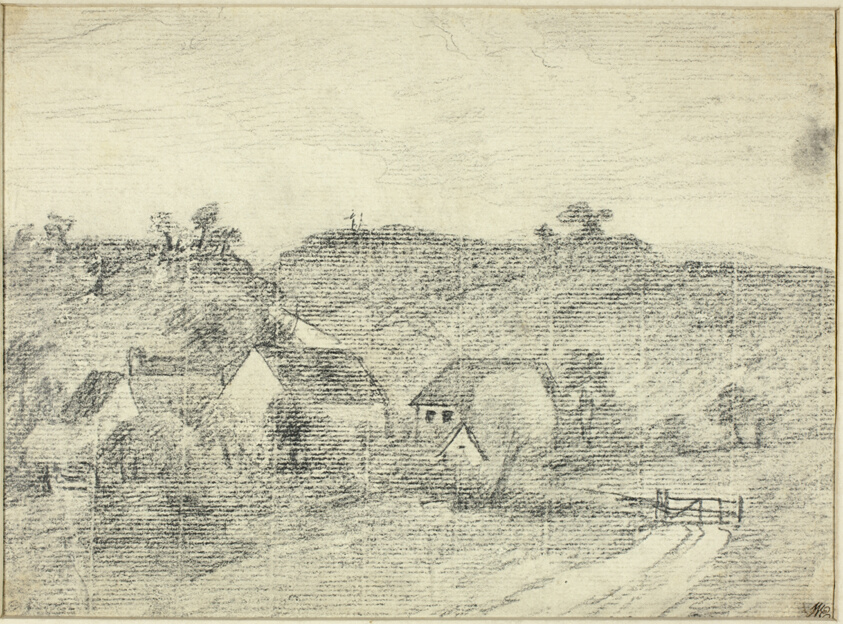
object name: Drawing and Watercolor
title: Country Cottages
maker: Attributed to George Frost (English, c. 1754-1821); or Thomas Gainsborough (English, 1727-1788)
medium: Graphite on ivory laid paper, tipped onto ivory laid paper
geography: England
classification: graphite; drawings (visual works); prints and drawing